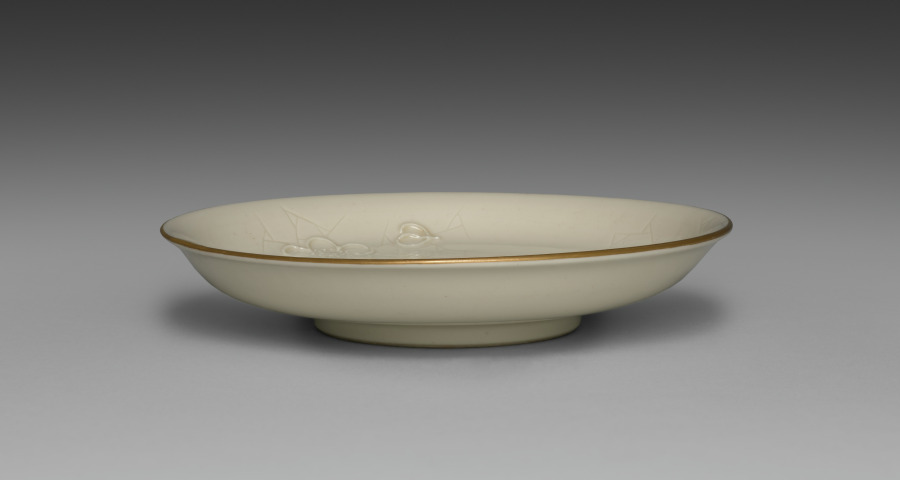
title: Medium-sized Dish from Dining Set with Plum Blossoms and Cracked-Ice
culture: Japan, Meiji period (1868–1912)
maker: Seifū Yohei II (Japanese, 1844–1878)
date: c. 1875–78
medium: Porcelain with molded designs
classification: Ceramic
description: Each item in this set has a delicate low-relief design of flowering plum branches over scattered, intersecting lines meant to resemble the cracked-ice surface of a frozen body of water and is signed on the base in gold pigment. While Yohei II produced many fine works in underglaze blue, like those produced by Kiyomizu Shichibei, he also made works in quite different styles later in his career, from the early 1870 s. In 1873, he was appointed purveyor to the Industrial Center of Kyoto Prefecture, a designation associated with Kyoto’s efforts to reach an international market through the port of Kobe; and from 1875 until his death, he was involved in national-level projects to present Japanese ceramics across the world. It was during this period that Yohei III was apprenticed to Yohei II, and it has been suggested that this set may in fact be an early example of Yohei III’s work, which he signed with his teacher’s name. Decorated with flowers resembling Japanese textile motifs, the set calls to mind the design of Yohei II’s pair of vases with plum blossoms in the Victoria and Albert Museum. Here, the elaborate trees created for a formal public exhibition setting have been translated into the approachable blossoms of the genteel domestic environment. While the designs are consistent across the pieces, each raised flower petal and pistil and each incised line in the ice was done by hand, so the cups, bowls, and dishes are similar yet unique. The bottoms of two boxes once identified the set’s owner, but the information has been deliberately obscured with black ink. However, inscriptions still visible appear to indicate two occasions, once at the end of July 1886 , and once again in June 1916 , when parts of the set were requested from Hokura in Niigata Prefecture. The location corresponds to a neighborhood in the present-day city of Jōetsu. The surname Tsuji 辻 also appears on a paper tag affixed to one of the box cloths. Future research may possibly reveal more about their provenance. A vase by Yohei III in a private collection combines the formal grandeur of the Yohei II vases in the Victoria and Albert Museum with the gentler design of this dining set, placing flowering plum trees against soft, scalloped-edge clouds resembling those in golden screens.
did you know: The dining wares have a creamy white coloration that the four boxes containing them identify as Korean in style.